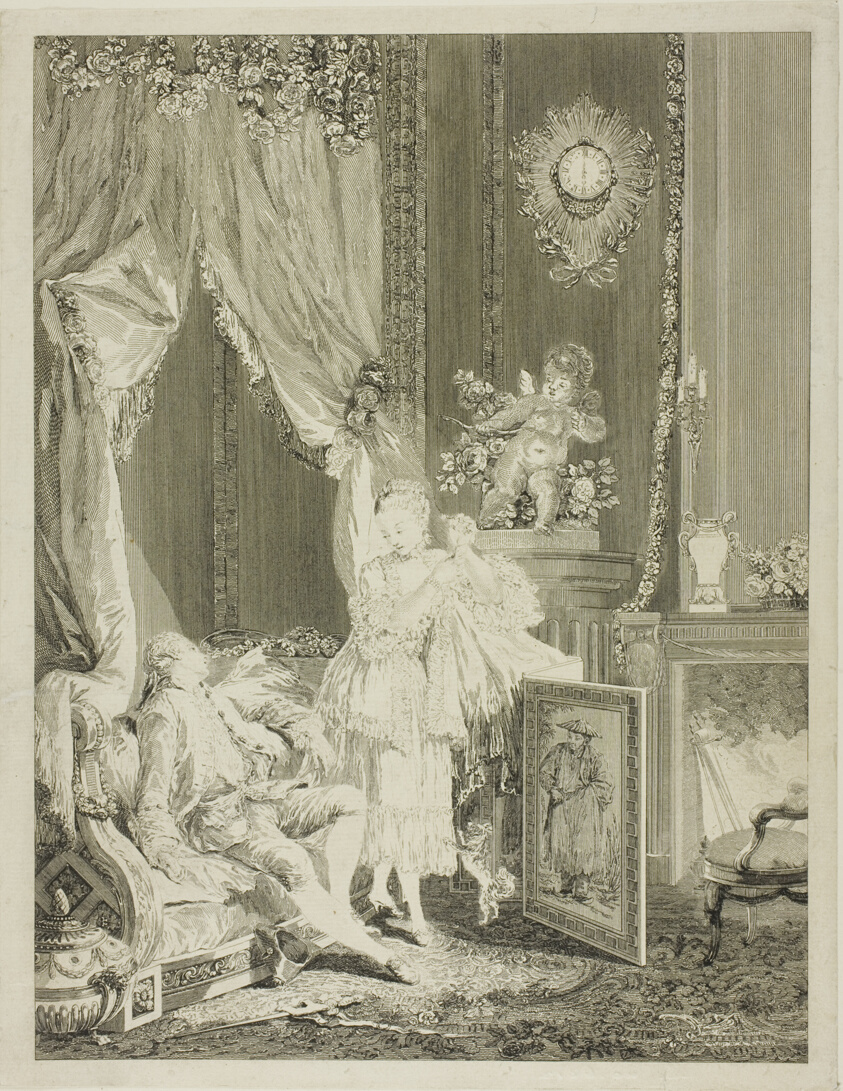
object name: Print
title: Le carquois épuisé (The Empty Quiver)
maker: Nicolas Delaunay (French, 1739-1792); after Pierre Antoine Baudouin (French, 1723-1769)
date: 1775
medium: Etching and engraving in black ink on white laid paper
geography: France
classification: etching; print; prints and drawing